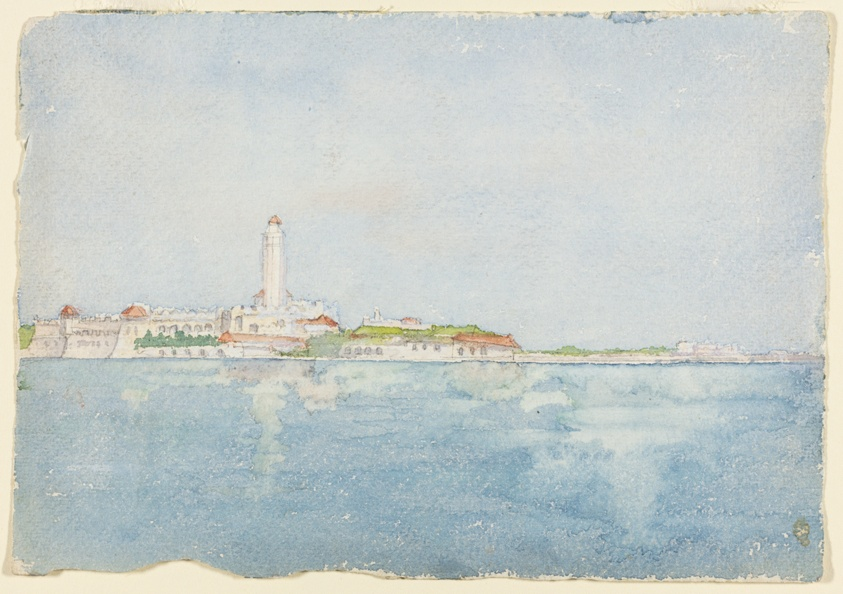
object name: Architectural Drawing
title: Sketch Taken at Algiers, North Africa, Travel Sketch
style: 19th century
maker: Daniel Hudson Burnham (American, 1846–1912)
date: 1896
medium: Watercolor over graphite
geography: Algeria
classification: travel sketch; architectural drawing; architecture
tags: city scenes, architecture, landscapes, North Africa